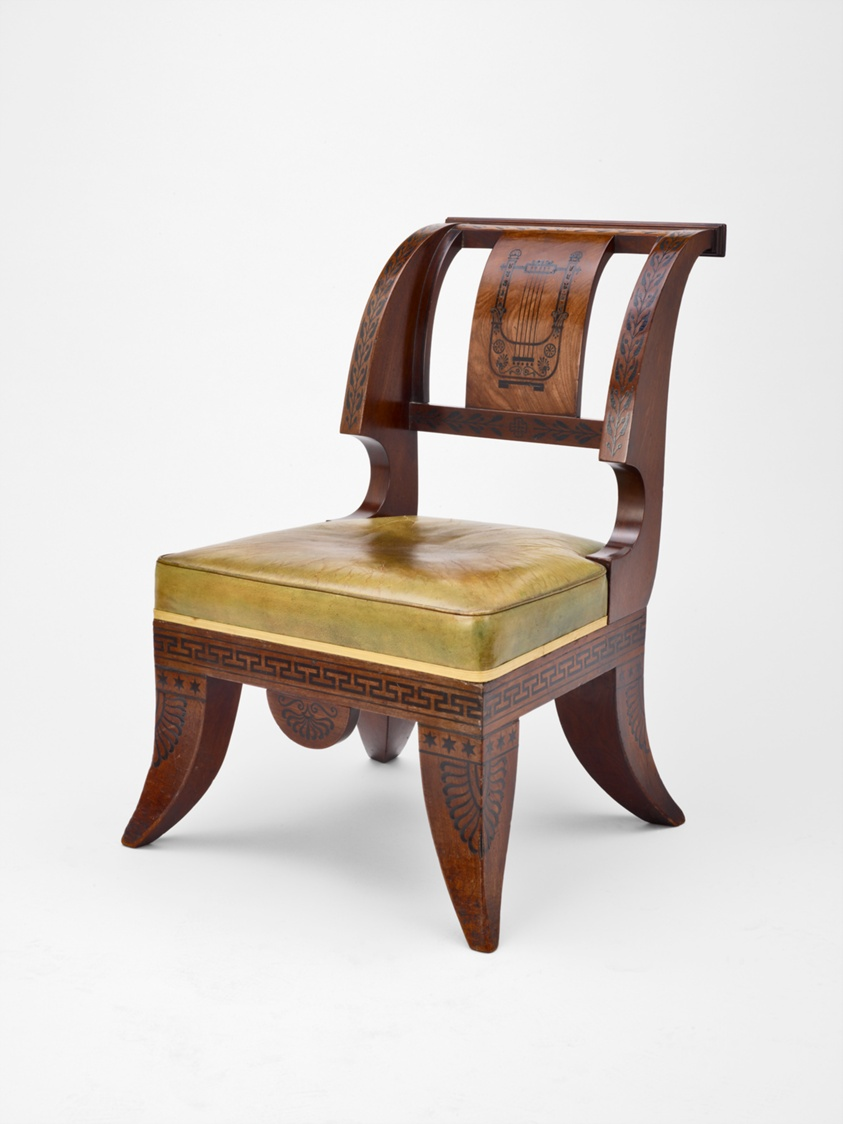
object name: Furniture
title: Chair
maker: After a design published by Thomas Hope; English, born Netherlands, 1769–1831; England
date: 1802–10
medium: Mahogany, ebony, beech, and leather upholstery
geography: England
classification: chair; seating; furniture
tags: furniture